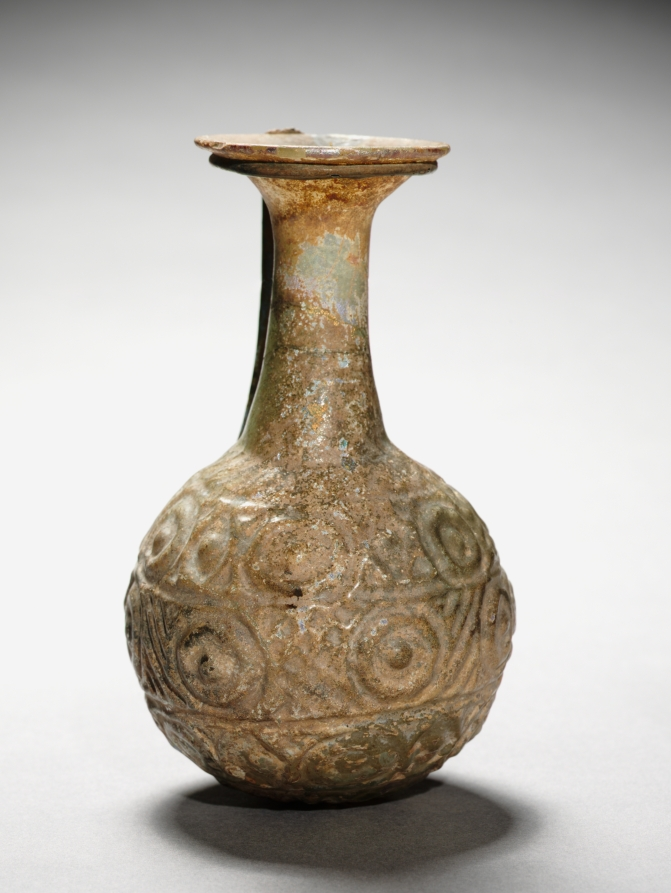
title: Pitcher with Handle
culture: Roman, Syro-Palestinian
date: 300s CE or later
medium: glass, mold-blown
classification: Glass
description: Featuring a globular mold-made body with three bands of geometric ornament (mostly concentric circles) in low relief, this pitcher could have been used for pouring water, wine, or other liquids. The separately made handle, decorated with four vertical ribs, is attached below the wide mouth by means of a coil.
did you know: Even the underside of this pitcher’s base is decorated, with a mold-made sunburst pattern.